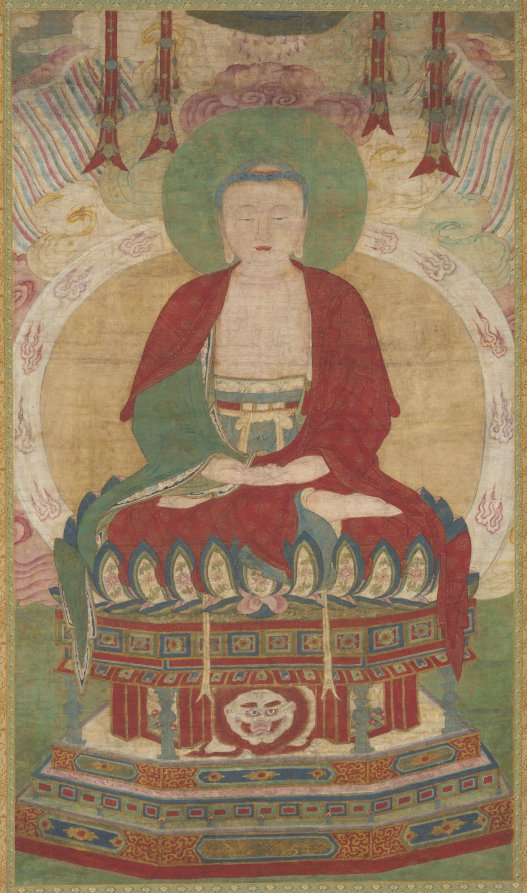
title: Seated Amitābha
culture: Chinese, Ming dynasty (1368-1644)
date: late 1500s–early 1600s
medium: hanging scroll; ink and color on silk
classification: Painting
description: This magnificent Buddha, called Amitābha (literally, “infinite light”) is seated on a lotus pedestal with both palms facing up over crossed legs, suggesting that it is in deep meditation. In contrast to the richly ornamented throne on which the Buddha is seated, the figure itself is devoid of any jewelry or decorative attributes, emphasizing its enlightened status and detachment from worldly affairs. The lion head in the center of the pedestal is a motif from Central Asia, which can also be seen in the halo or nimbus of Chinese Buddhist stone steles.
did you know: Originally, this scroll was acquired by the museum as a Korean work, but has now been tentatively reattributed as Ming period Chinese.